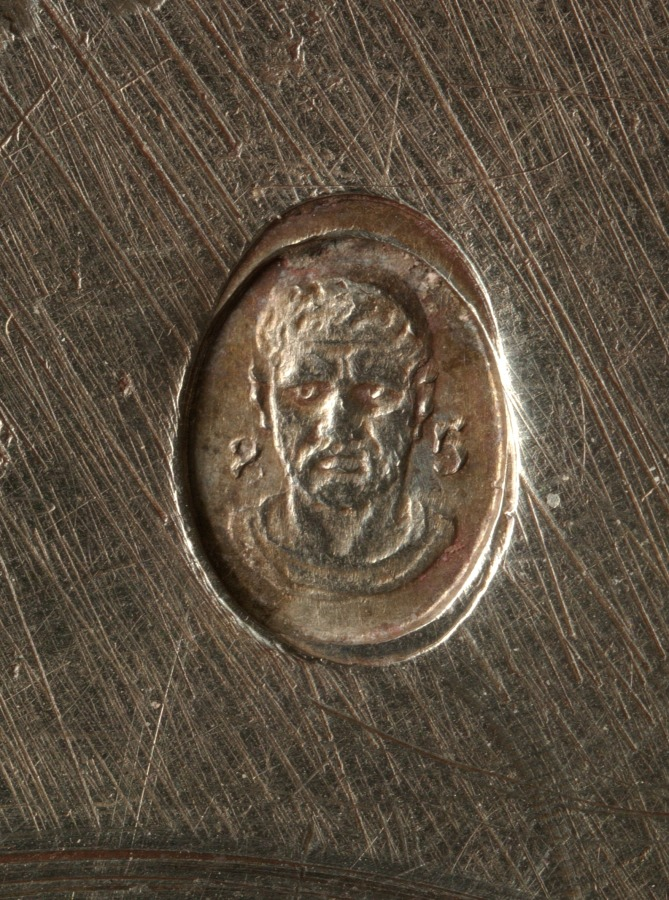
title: Covered Tureen on Stand (Pot à oille)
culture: France, late 18th-early 19th Century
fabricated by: Henry Auguste (French, 1759–1816)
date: 1797–98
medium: silver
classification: Silver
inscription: [Coat-of-arms of Amoral don Federico Carlos Gravina on bowl; cover; stand]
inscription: [Assay mark for large-sized work, 1798-1809, lining exterior; tureen foot exterior]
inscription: [Assay mark for medium-sized work, 1798-1809, beneath stand foot; on edge of cover]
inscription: [Maker's mark of Henri Auguste, master silversmith in 1785, beneath tureen foot; beneath stand foot; inside stand foot edge]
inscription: [Official assay mark for first standard silver, Paris, 1798-1809, beneath stand foot; lining exterior; on cover]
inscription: [Official mark for silver imported from countries with customs conventions, 1838-1912, beneath stand foot; edge of cover; tureen lip exterior; lining exterior; on one tureen handle; outside stand foot; tureen foot exterior]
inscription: [Unknown mark, possibly Ceres' profile in square with "E" and "7", beneath stand foot; on cover; rim of lining; tureen foot exterior; tureen lip exterior]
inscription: [Unofficial assay mark for first standard silver, Paris, 1794-1797, beneath foot stand; beneath tureen foot; near tureen handle exterior]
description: This pot-à-oille was designed by master goldsmith Henri Auguste after drawings by draftsman and sculptor Jean Guillaume Moitte. Though many of the neoclassical decorative elements on this piece are pulled from Moitte’s design, Auguste’s final product leaves out much of the proposed ornamentation. Instead this object finds distinction in its large size and smooth expanses of silver that emphasize the purity of its lines.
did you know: The coat of arms on the body of the work corresponds to the family of Federico Carlos Gravina, a Sicilian-Spanish admiral who was known to have had a close diplomatic relationship with Napoleon I.